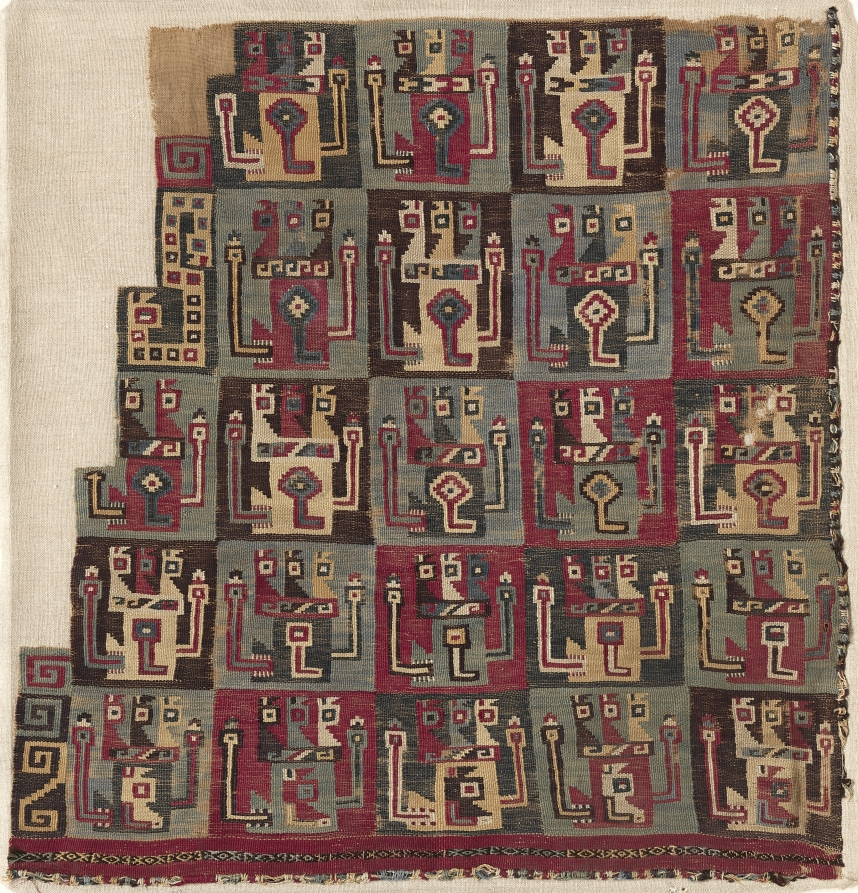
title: Mantle Corner Fragment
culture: Peru, South Coast, Wari Culture, Middle Horizon, 8th-12th Century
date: c. 700–1100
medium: cotton and camelid fiber; plain weave with supplementary weft (brocade)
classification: Textile